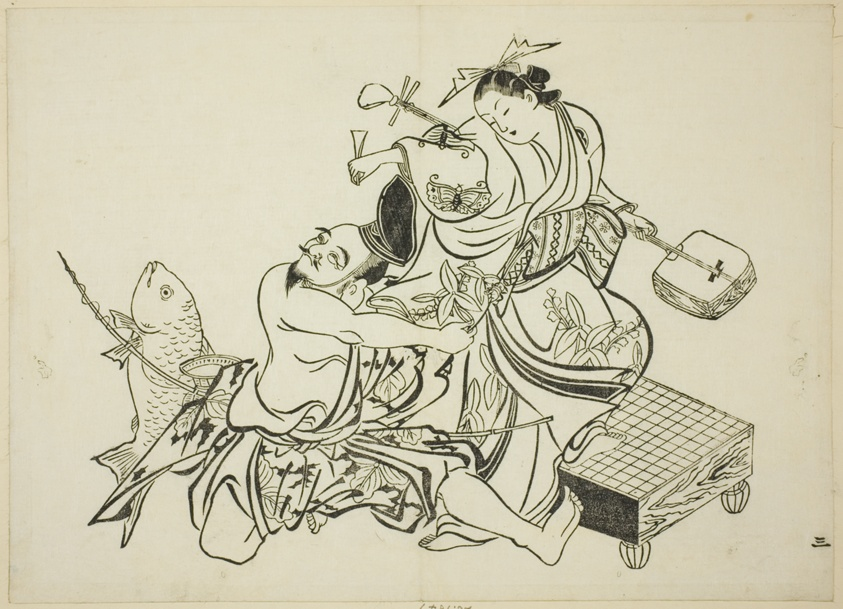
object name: Print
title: Ebisu flirting with a courtesan, no. 3 from a series of 12 prints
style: Japanese (culture or style)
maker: Okumura Masanobu (Japanese, 1686-1764)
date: c. 1708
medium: Woodblock print; oban, sumizuri-e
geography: Japan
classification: woodblock print; print; asian art; woodblock